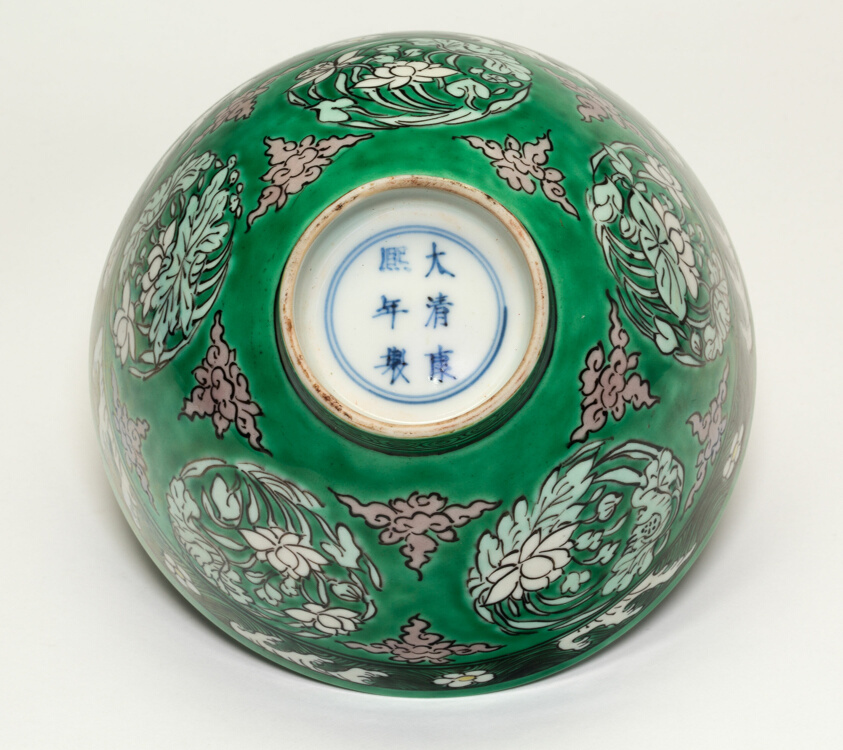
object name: Vessel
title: Bowl with Floral Medallions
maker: China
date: Qing dynasty (1644–1911), Kangxi reign mark and period (1662–1722)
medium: Porcelain painted in green, yellow, and aubergine glaze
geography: China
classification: porcelain; asian art; ceramics; vessel